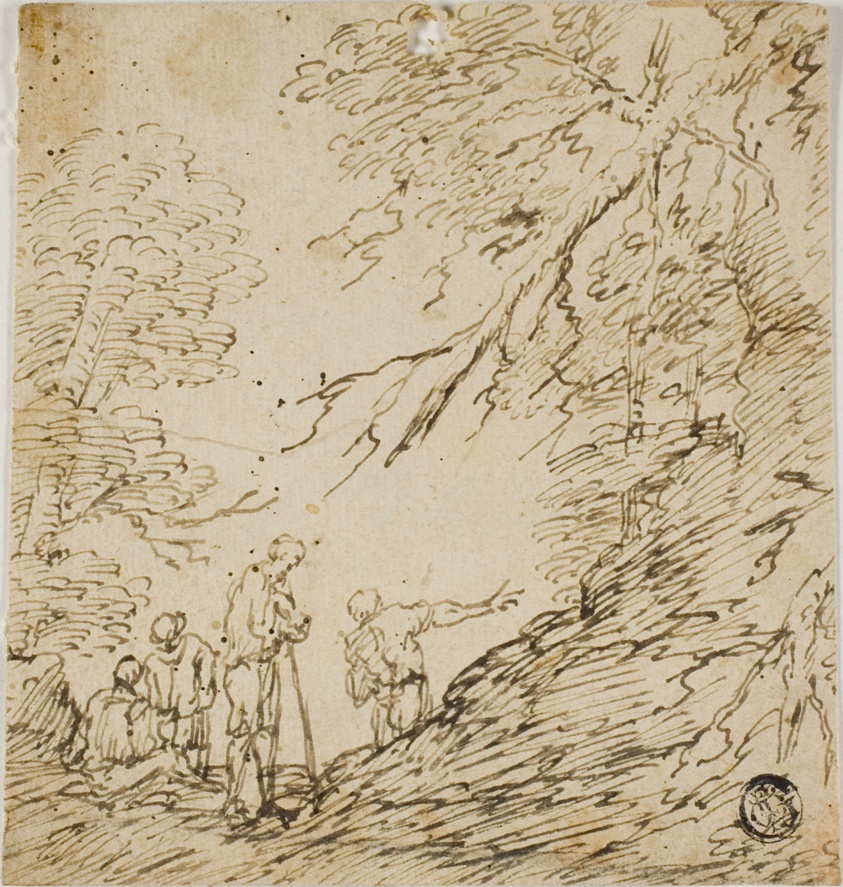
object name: Drawing and Watercolor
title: Four Men in Forest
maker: Style of Salvator Rosa (Italian, 1615-1673); or possibly Jacopo Robusti, called Tintoretto (Italian, 1519-1594)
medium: Pen and brown ink on tan laid paper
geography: Italy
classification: pen and ink drawings; drawings (visual works); prints and drawing